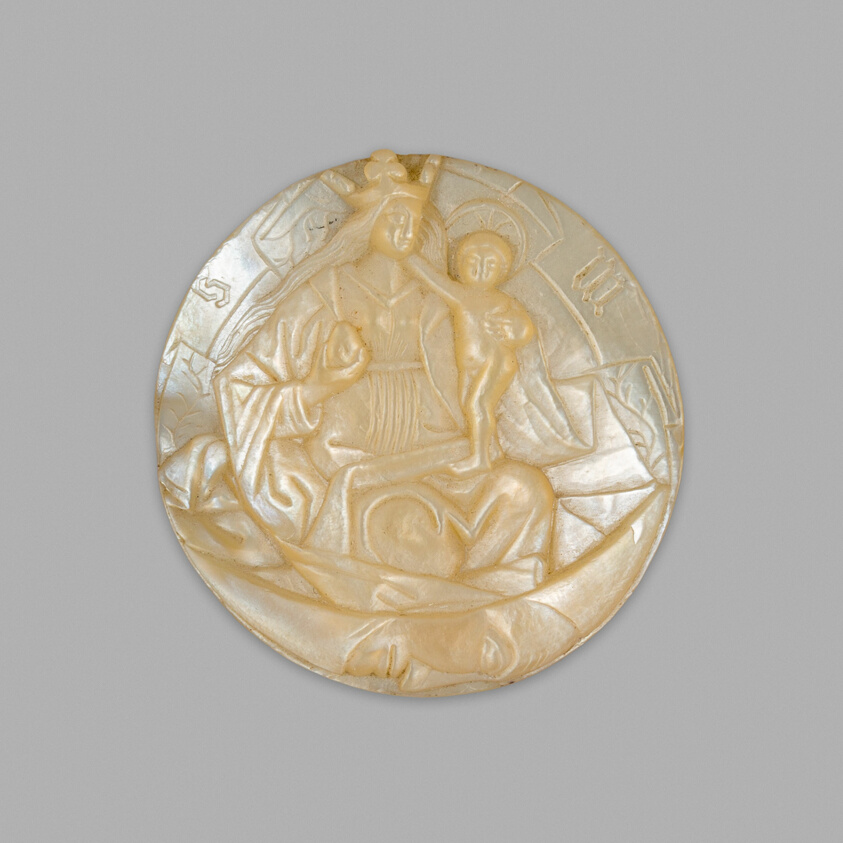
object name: Sculpture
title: Cover of a Reliquary Container with the Virgin and Child on the Crescent Moon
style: 15th century, Renaissance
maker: South German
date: about 1480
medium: Mother-of-pearl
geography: Southern Germany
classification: ritual objects; sculpture; german; pearlware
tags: Virgin and child/Madonna and child, boys, woman, Christianity, Christian subjects, religious scenes, religious figures, religious, religion, sons, child, mother, Jesus, Virgin Mary